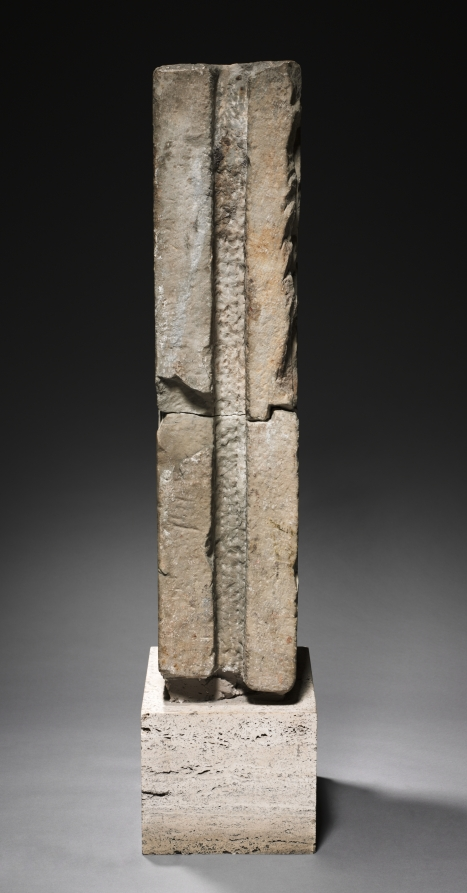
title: Transenna Post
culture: Lombardic, Italy, Rome, Migration period, 8th-9th Century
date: 700s–800s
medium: marble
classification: Sculpture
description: In Christian architecture a transenna is an openwork screen of stone or metal enclosing a shrine. These transenna elements were found in Rome; the posts were said to have been excavated on the Coelian Hill and may have originally formed part of the transenna of the Church of San Saba. The Lombards were an ancient Germanic-speaking tribe that settled in Italy after 568. Their artistic tradition was originally centered on small objects of personal adornment like buckles and brooches. After occupying Italy, the Lombards were in contact with large-scale sculpture of classical and early Christian origin that, by the end of the 700s, they had learned to adopt and imitate, as seen here.